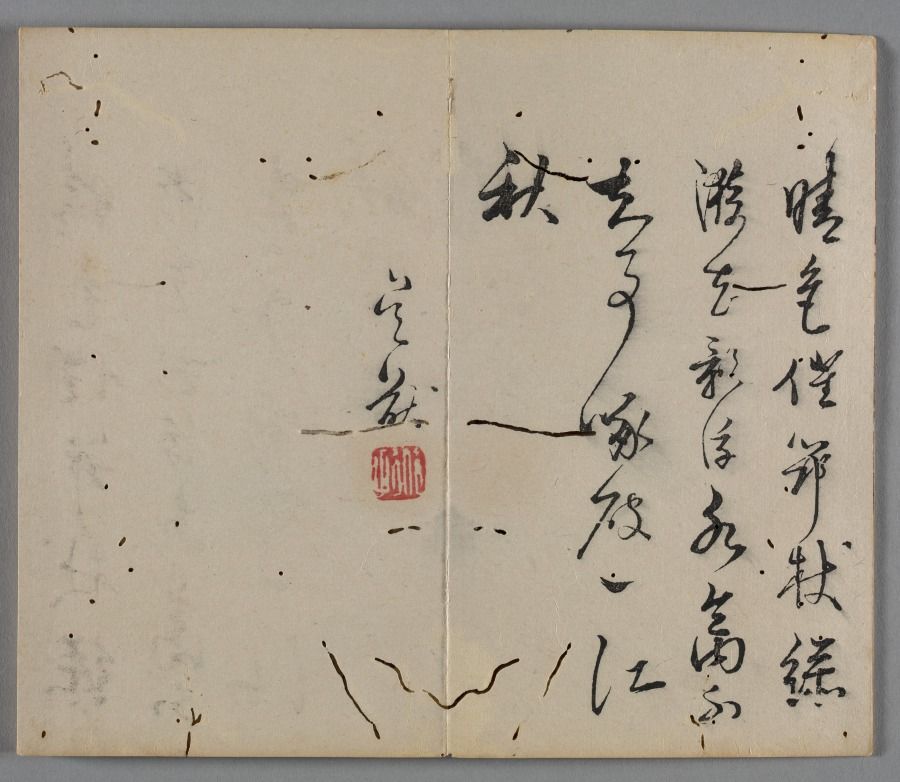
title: Ten Bamboo Studio Painting and Calligraphy Handbook (Shizhuzhai shuhua pu): Birds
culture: China, Qing dynasty (1644-1911)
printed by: Hu Zhengyan (Chinese, c. 1584–1674)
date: 1633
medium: Woodblock-printed book; ink and colors on paper; first edition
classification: Print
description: Color printing reached a level of perfection in the early 1600s, as seen in this Ten Bamboo Studio Collection of Calligraphy and Painting and the Mustard Seed Garden Manual of Painting (printed 1679 and 1701). The painterly quality, precision in registering (aligning) the woodblocks, and harmonious colors made them the most successful color print editions in Chinese history. Both editions were printed and compiled in Nanjing, spread nationwide, and had a great impact on the arts in Japan and Korea.